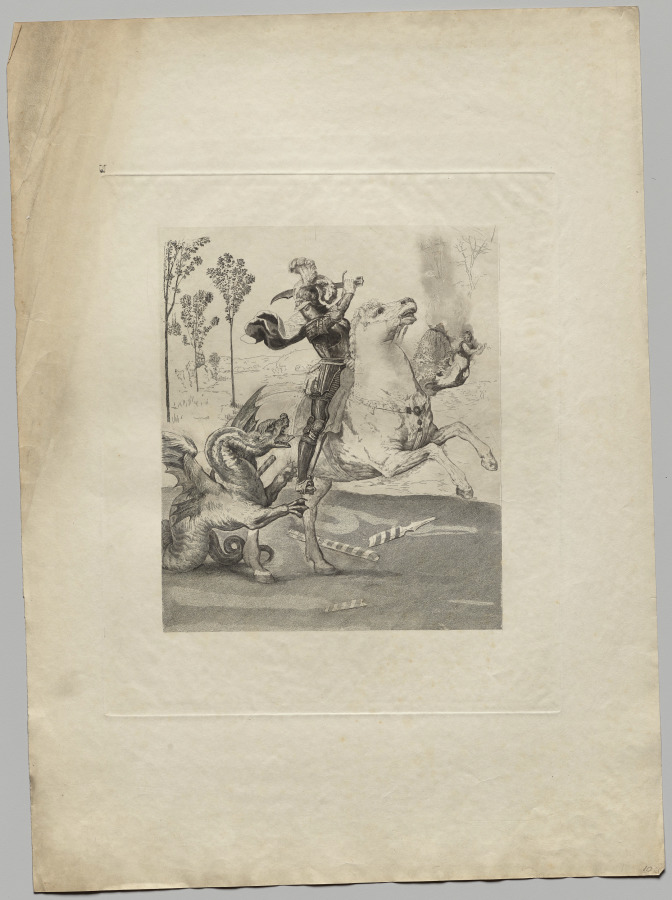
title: St. George and the Dragon (2)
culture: France, 19th century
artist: Claude-Ferdinand Gaillard (French, 1834–1887)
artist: after Raphael (Italian, 1483–1520)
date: 1885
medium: engraving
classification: Print